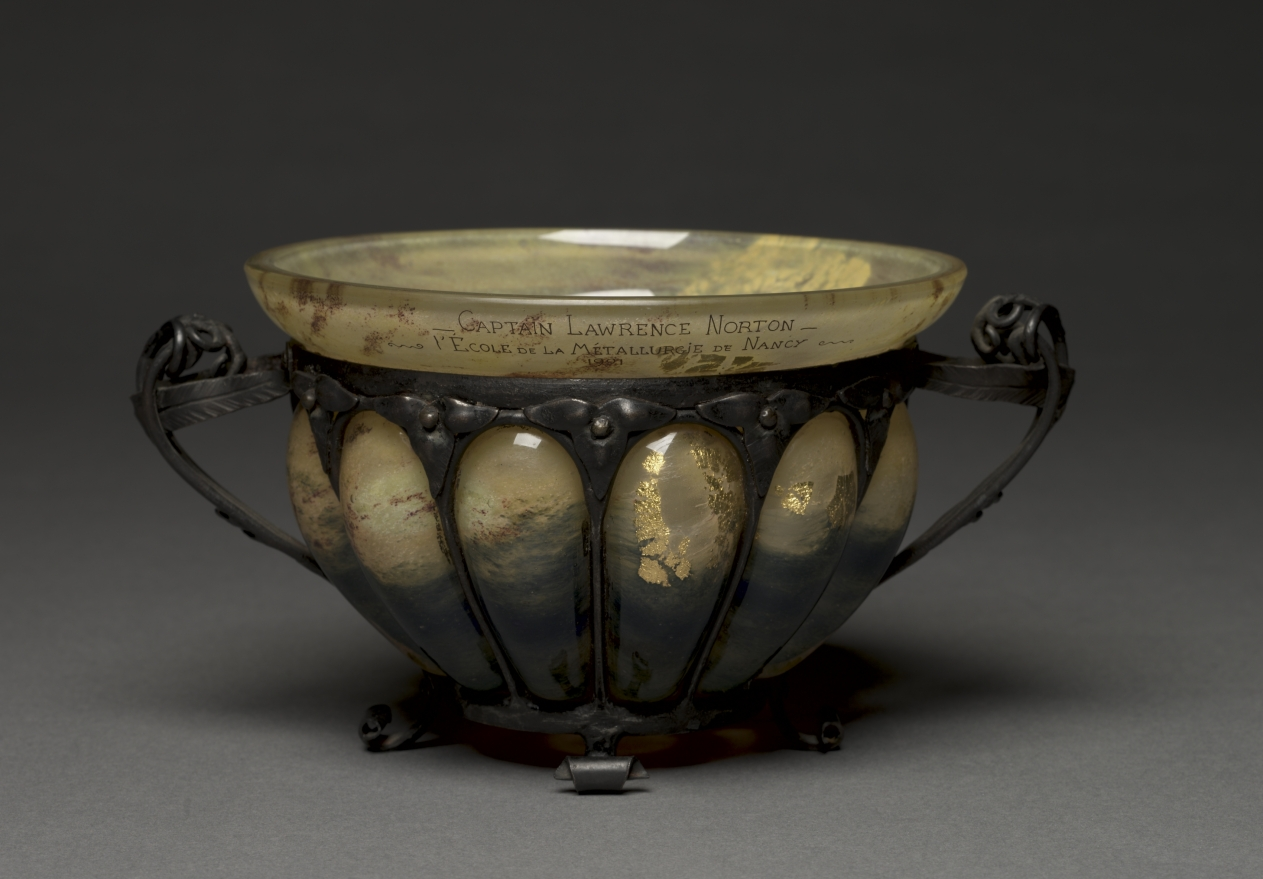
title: Bowl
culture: France, Nancy, 20th century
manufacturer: Daum Brothers (French)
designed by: Louis Majorelle (French, 1859–1926)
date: 1900–1925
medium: glass blown into bronze cage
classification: Glass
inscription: signed on bottom: "Daum/Nancy/ [symbol] / L.Majorelle." Inscribed on rim: "Captain Lawrence Norton/l'Ecole de la Metallurgie de Nancy/1921."